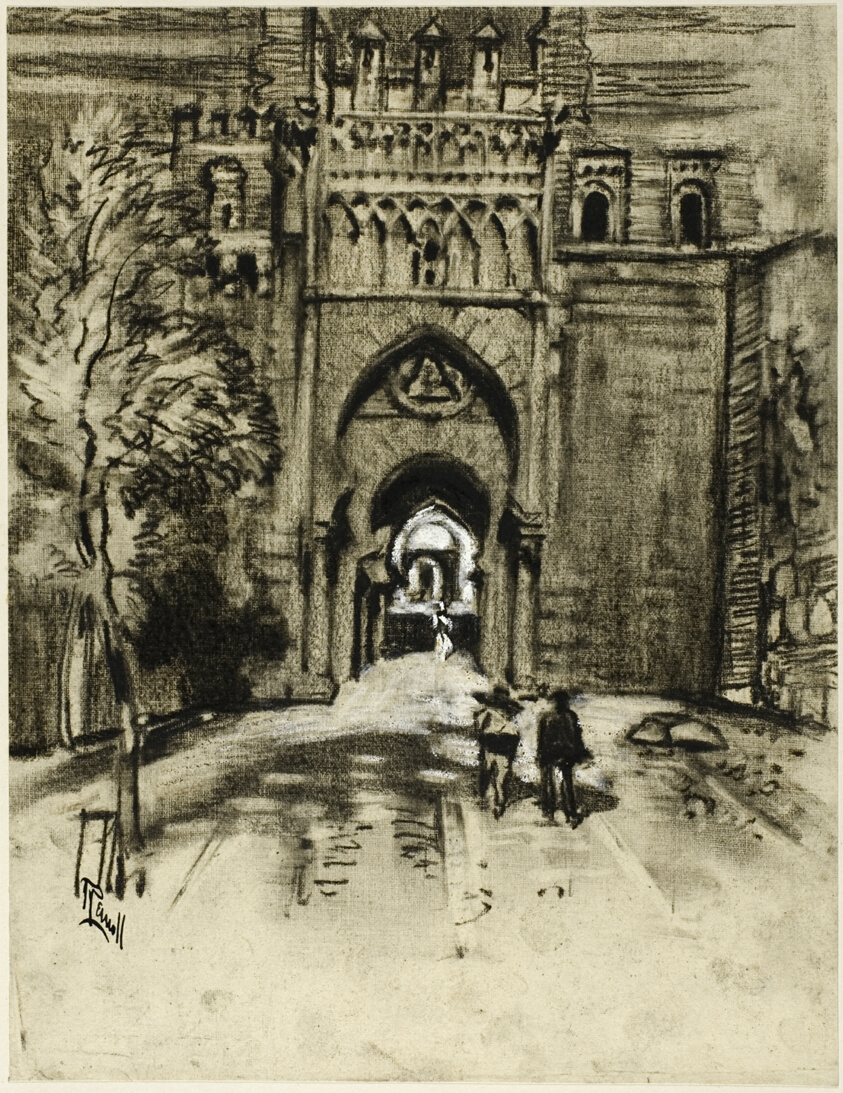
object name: Drawing and Watercolor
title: Superb Puerta del Sol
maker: Joseph Pennell (American, 1857-1926)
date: c. 1903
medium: Oiled charcoal with stumping and erasing, heightened with touches of white chalk, on cream wove paper, perimeter mounted on off-white wood pulp laminate board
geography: United States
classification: charcoal; drawings (visual works); prints and drawing